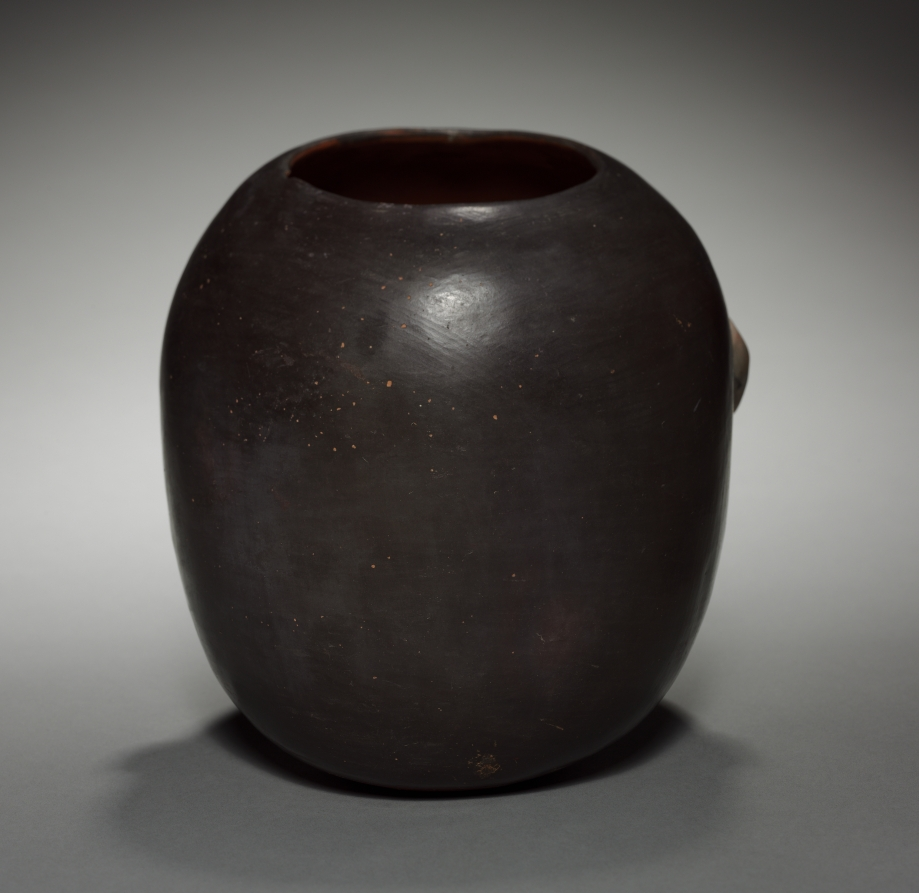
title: Severed Head Effigy Vessel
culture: Peru, South Coast, Nasca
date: c. 100–350 CE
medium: earthenware with colored slips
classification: Ceramic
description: The Nasca people were organized politically into small, competing chiefdoms, and warfare was common. This vessel represents a freshly severed human head (probably that of a captured and sacrificed prisoner) with staring eyes, gaping mouth, and blood-red underside. Modeling of the mouth cavity, tongue, and teeth lends the image a startling realism. Human sacrifice by decapitation was a central element of Nasca religion, essential to agricultural fertility. Severed heads were emptied and dried, then pierced through the forehead and suspended from a thick cord. Such preserved heads have been recovered from offering deposits and from tombs, where they were buried with their captors.